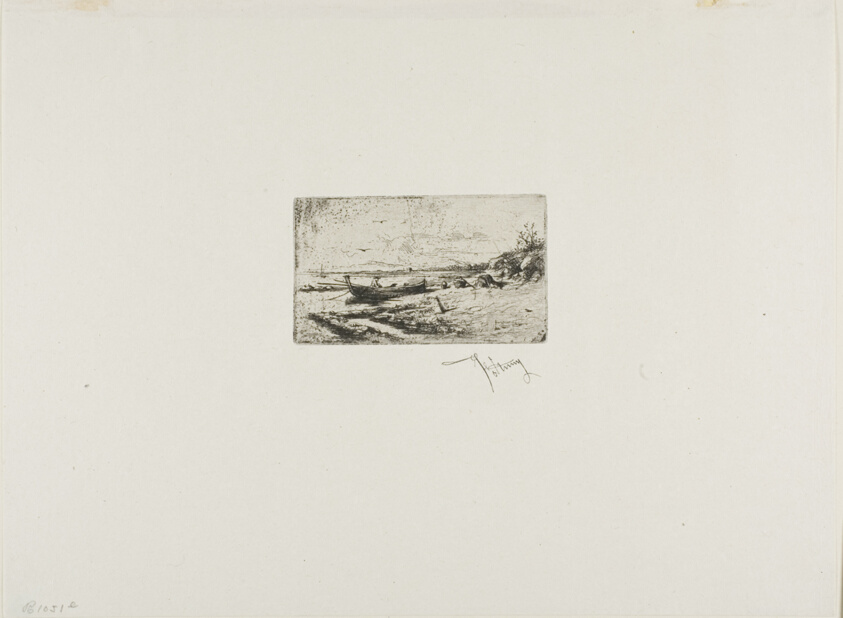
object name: Print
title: The Fisherman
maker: Mariano José María Bernardo Fortuny y Carbó; Spanish, 1838-1874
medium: Etching on paper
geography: Spain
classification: etching; print; prints and drawing